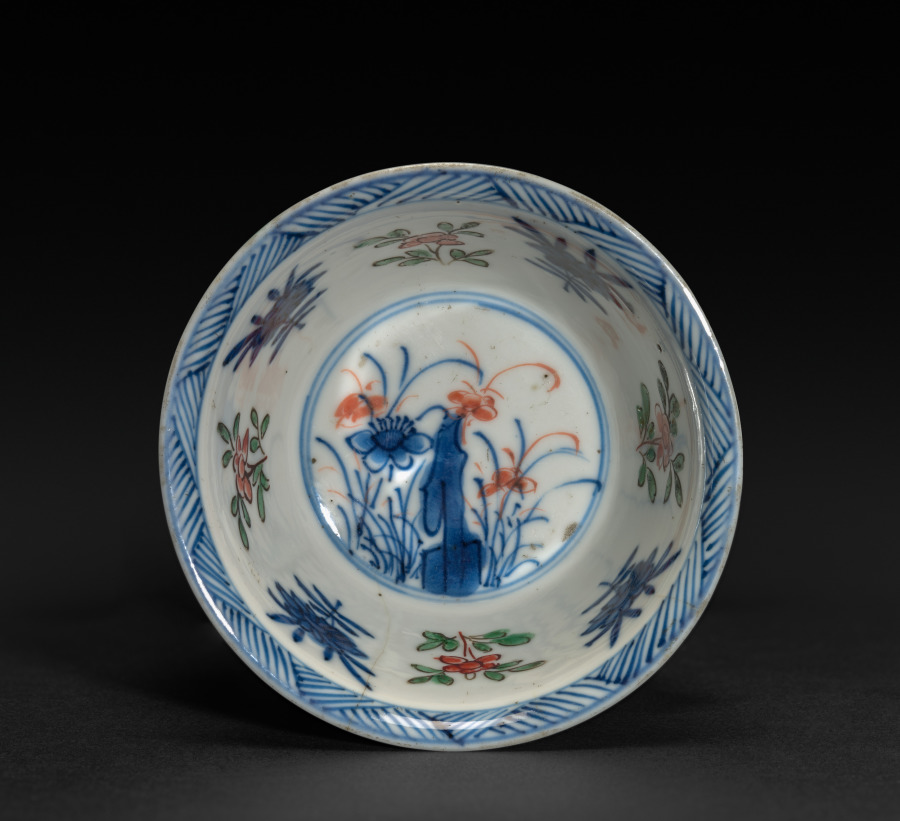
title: Cup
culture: China, Qing dynasty (1644-1911), Kangxi reign (1662-1722)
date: 1662–1722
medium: porcelain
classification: Ceramic